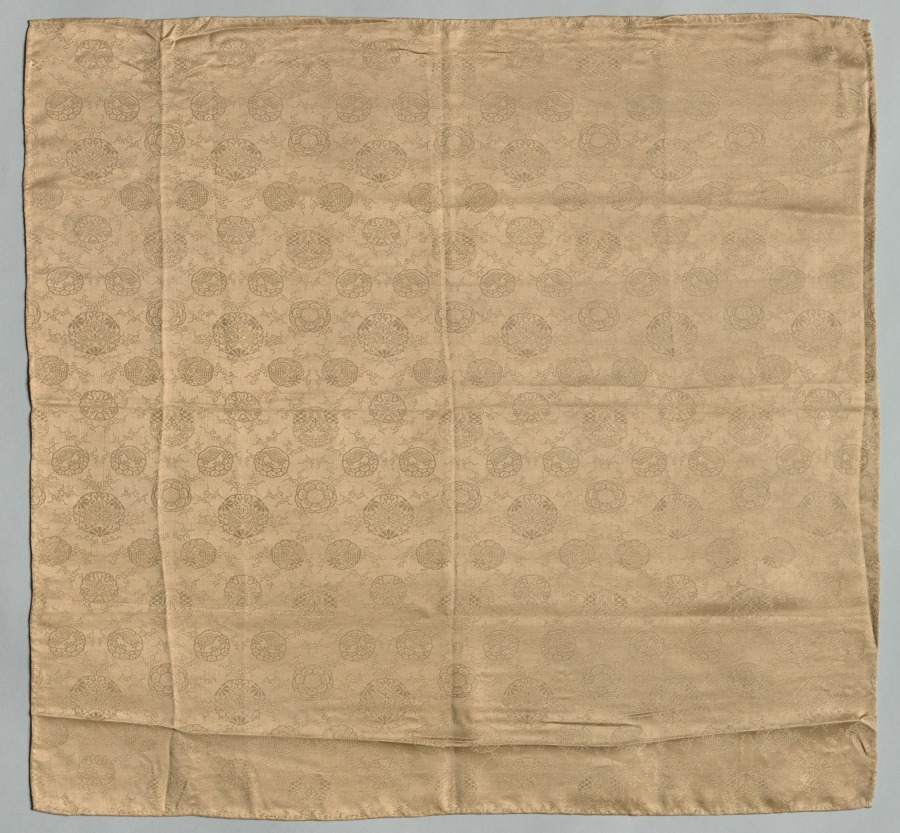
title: Fragment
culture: China, 19th century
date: 1800s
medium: silk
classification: Textile